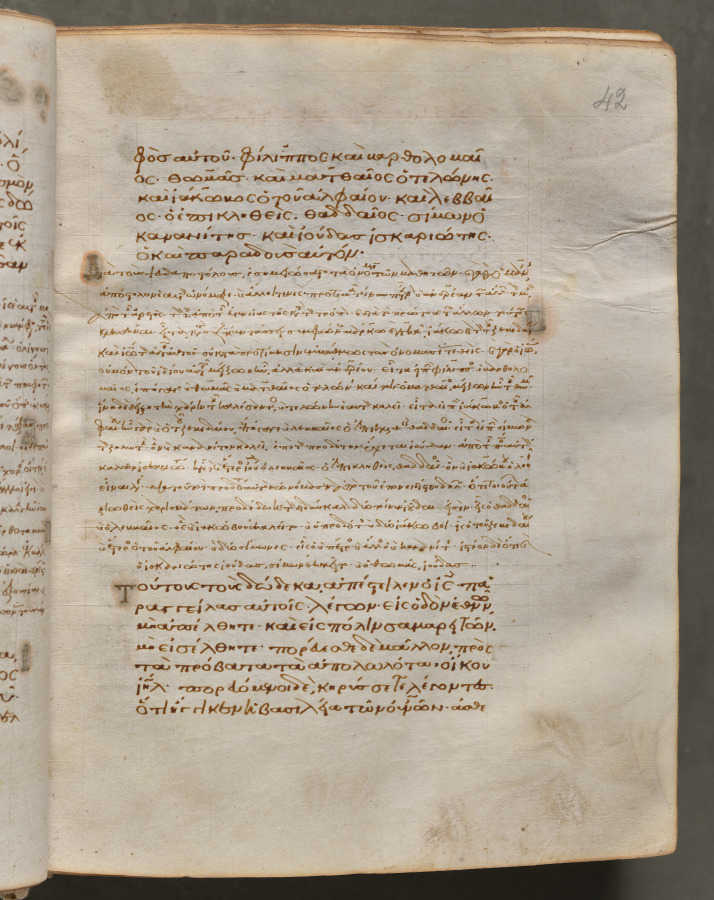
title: Text, folio 42 (recto), from a Gospel Book with Commentaries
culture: Byzantium, Constantinople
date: c. 1000–1100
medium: ink, tempera, and gold on vellum; leather binding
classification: Bound Volume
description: Each of the four gospels in this book opens on a page with brilliantly illuminated borders depicting the author of the text as well as birds-principally peacocks, symbols of the immortality of the soul-and fountains, representing the fountain of life and the salvation of the soul. This volume consists of 428 leaves with texts in Greek. Its level of sophistication suggests that it was probably written and decorated in a monastery in Constantinople.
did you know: Gospel Books were carried in procession through Byzantine churches.